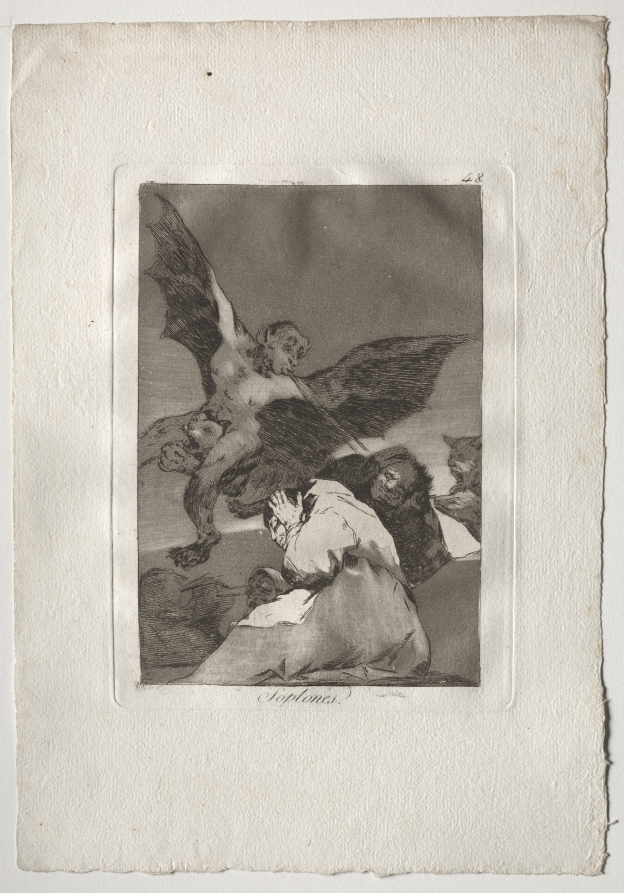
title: Tale-Bearers - Blasts of Wind, Plate 48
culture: Spain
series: Los Caprichos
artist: Francisco de Goya (Spanish, 1746–1828)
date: 1799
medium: etching and aquatint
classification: Print